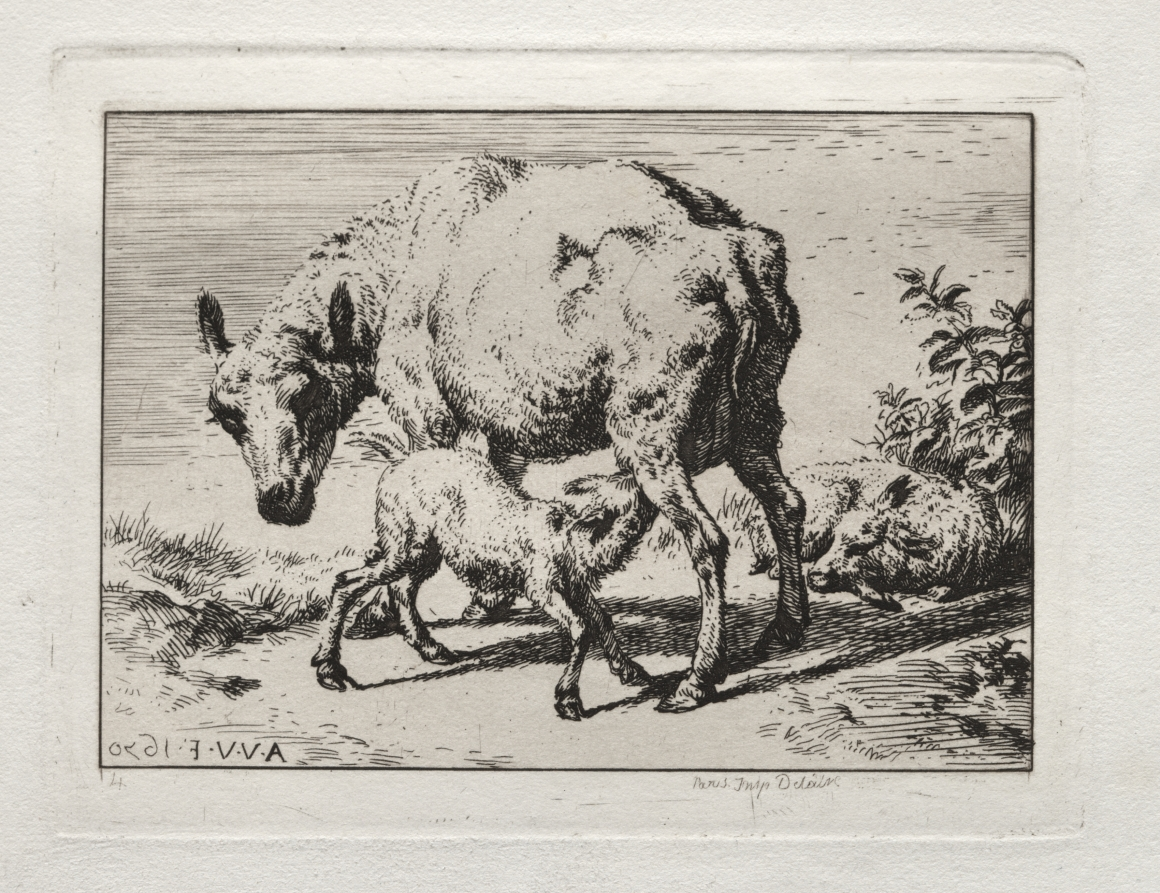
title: The Ewe with Two Lambs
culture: France, 19th century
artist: Charles Meryon (French, 1821–1868)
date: 1850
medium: etching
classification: Print